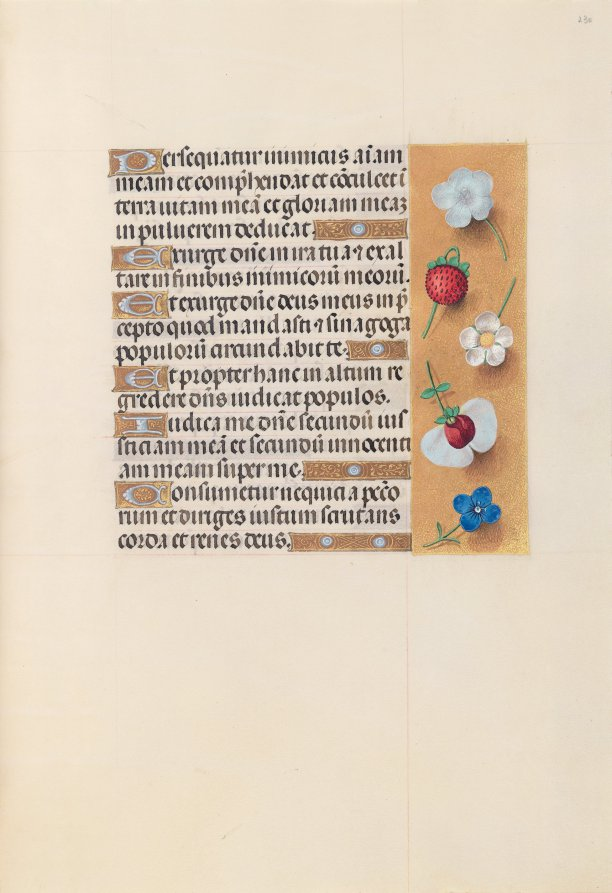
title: Hours of Queen Isabella the Catholic, Queen of Spain: Fol. 230r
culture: Flanders, Ghent and Bruges, late 15th century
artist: Master of the First Prayerbook of Maximillian (Flemish, c. 1444–1519)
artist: and Associates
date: c. 1500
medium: ink, tempera, and gold on vellum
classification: Bound Volume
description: This manuscript was illuminated by a circle of at least five highly organized manuscript painters active in the Flemish cities of Ghent and Bruges. The principal illuminator was Alexander Bening, who painted the majority of the book's miniatures. Manuscripts produced by this circle of artists are renowned for the decoration of their borders, which typically feature a rich variety of realistically-painted flowers, birds, and butterflies. This prayer book, called a book of hours, was intended not for a cleric, but for the private devotions of a lay person-in this case, Isabella the Catholic, Queen of Spain (1451-1504). Isabella's coat of arms embellishes the book's frontispiece. It is unlikely that the book was commissioned by the Queen herself; rather, she probably received it as a diplomatic gift from someone courting her patronage, perhaps Cardinal Francisco Jimenez de Cisneros. A Franciscan friar, Jimenez was dependent upon Isabella for his advancement, first to the post of Queen's confessor in 1492, and then to Archbishop of Toledo in 1495.